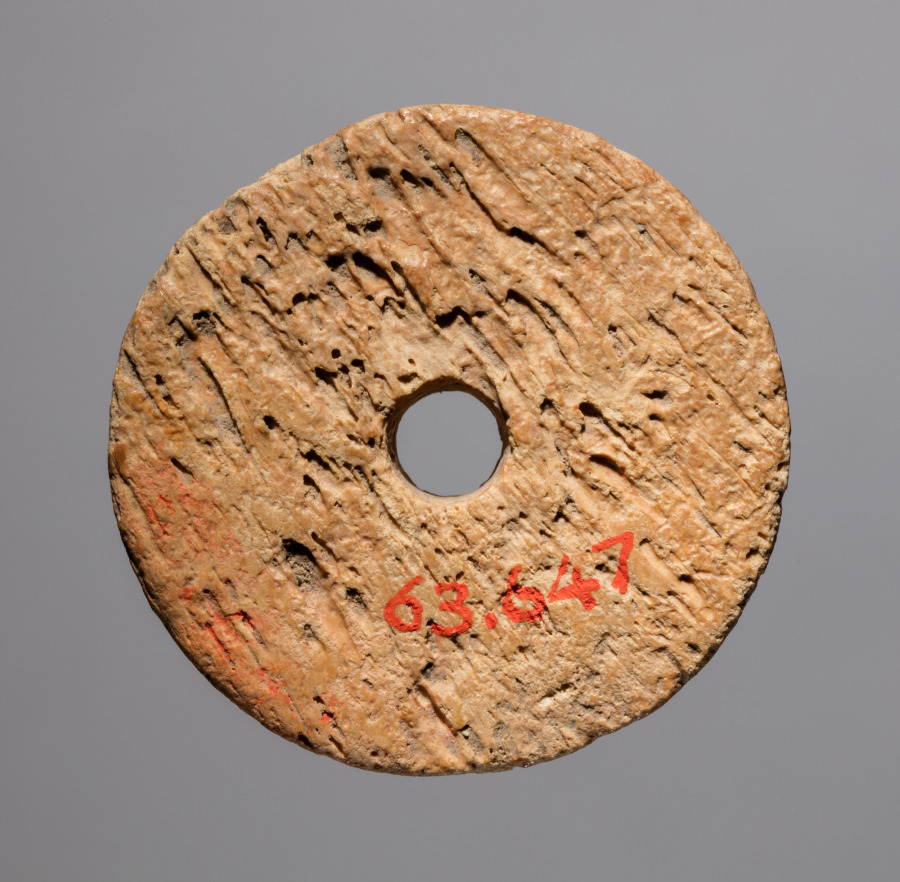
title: Spindle Whorl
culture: Iran, early Islamic period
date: 700s - 900s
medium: bone, incised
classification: Spindle Whorl